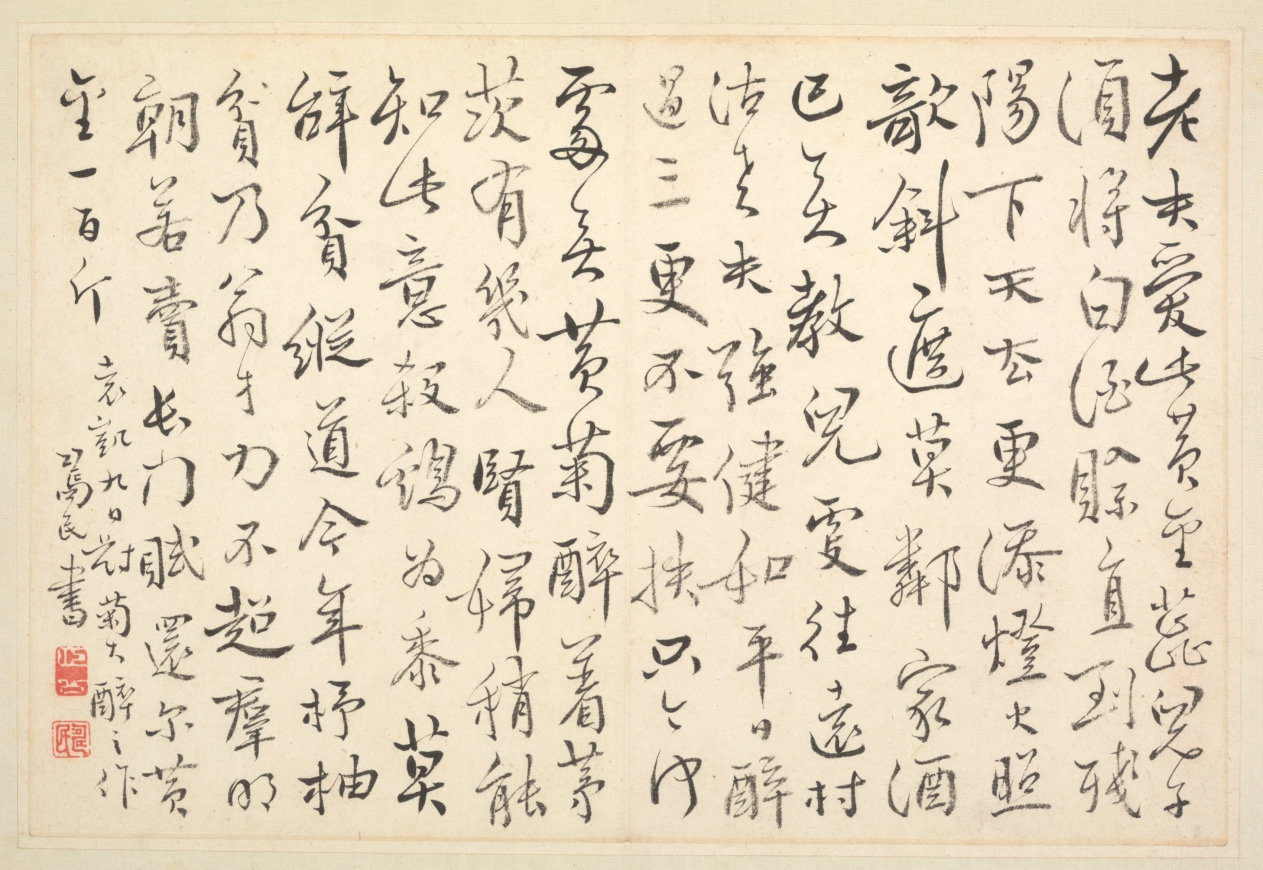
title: Album of Calligraphy and Paintings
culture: China, Qing dynasty (1644-1911)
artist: Bian Shoumin (Chinese, 1684–1752)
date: first half of the 1700s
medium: album leaf; ink and color on paper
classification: Painting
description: The artist Bian Shoumin is known for his depiction of wild geese, water, and reeds. The migrant birds in autumn and winter evoked, in the minds of the Chinese intelligentsia, a time of parting and sorrow.